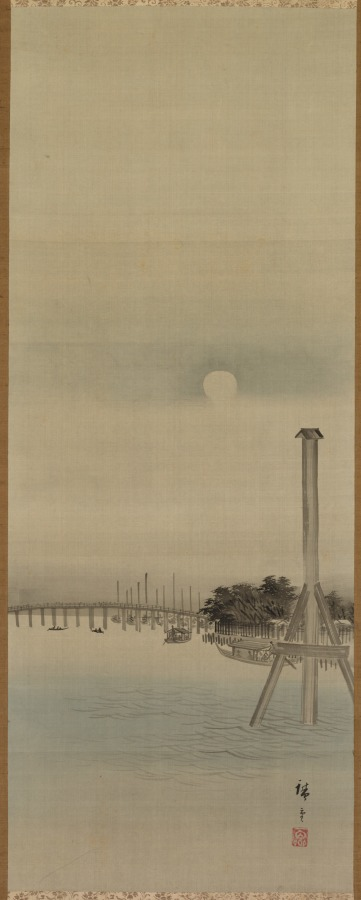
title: Night Scene on the Sumida River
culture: Japan, Edo period (1615–1868)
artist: studio of Utagawa Hiroshige (Japanese, 1797–1858)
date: 1800s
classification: Painting